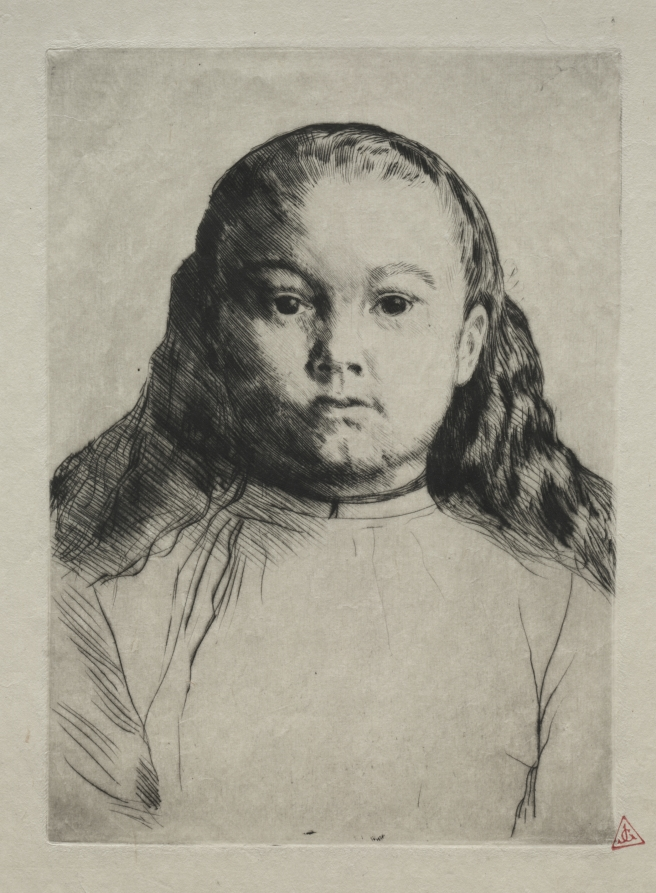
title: Little Marie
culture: France, 19th century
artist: Alphonse Legros (French, 1837–1911)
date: 1875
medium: drypoint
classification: Print